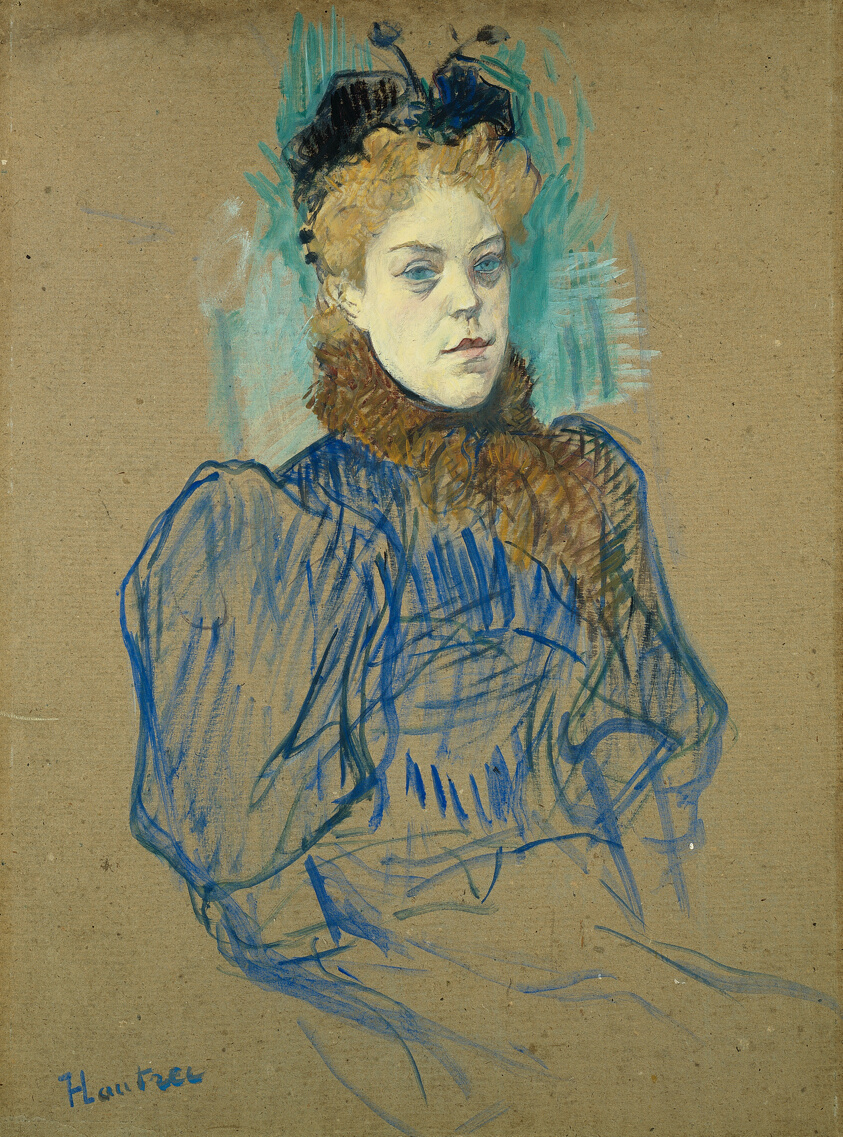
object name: Drawing and Watercolor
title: May Milton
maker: Henri de Toulouse-Lautrec (French, 1864-1901)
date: 1895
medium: Oil and pastel on cardboard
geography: France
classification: pastel; drawings (visual works); prints and drawing